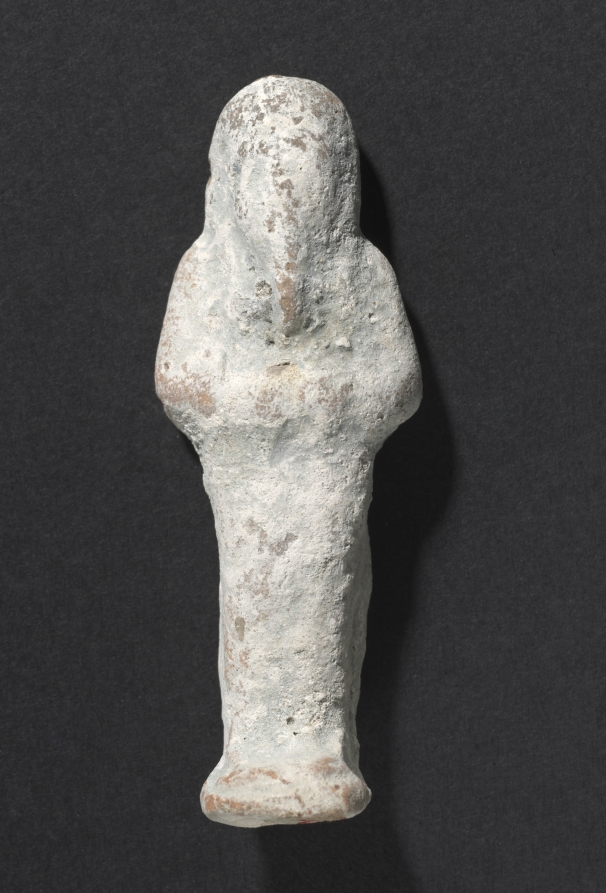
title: Shawabty of Ditamenpaankh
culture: Egypt, Late period (715–332 BCE), Dynasty 25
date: 715–656 BCE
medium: terracotta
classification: Funerary Equipment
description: High demand for shawabtys in the Late Period, a time when as many as 400 or more shawabtys were placed in the tomb with the deceased, gave rise to a specialized container for storing them: the shawabty box. This example is inscribed for the lady of the house, Ditamenpaankh, and was probably one of a pair originally made for her. The single-masted boat on the box's lid is perhaps an allusion to the pilgrimage of the deceased to the holy city of Abydos, the cult city of Osiris, king of the dead. The shawabtys inside are crude, mass-produced examples cast in an open mold. Made of terracotta, their blue paint imitates more costly shawabtys made of faience. As for the shawabty spell, it has been removed from its traditional location on the shawabty's front and relocated onto the sides of box, where it needed only to be written once, thus expediting production.